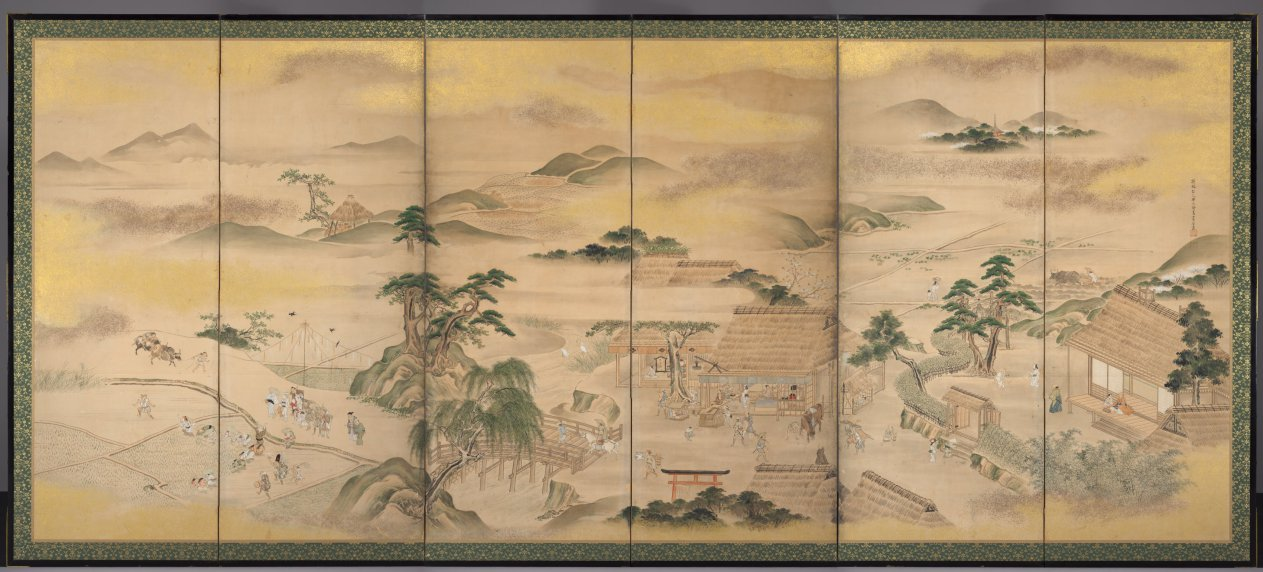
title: Spring and Autumn Farming (Spring)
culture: Japan, Edo period (1615–1868)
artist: Kō Sūkoku (Japanese, 1730–1804)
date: 1700s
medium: Six-panel folding screen, ink, light color, gold, and silver on paper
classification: Painting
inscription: Signature of the artist: "Enrin san jin Rakushisai ko Sukoku ga" (each screen)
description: These screens present the cycle of the farming year, starting with spring at right and ending with fall at left. Close examination of these screens reveals moments of games and amusement, the enjoyment of meals as well as intellectual and spiritual pursuits interspersed among the scenes of cultivating and preparing the rice harvest. The artist Kō Sūkoku is considered the 18th-century heir in style and attitude to Hanabusa Itchō (1652–1724). Itchō’s work incorporated elements from Kano school, ukiyo-e, and literati styles of painting. Kō trained with one of Hanabusa’s pupils, Sawaki Sūshi, who was best known for scenes depicting everyday life and customs.